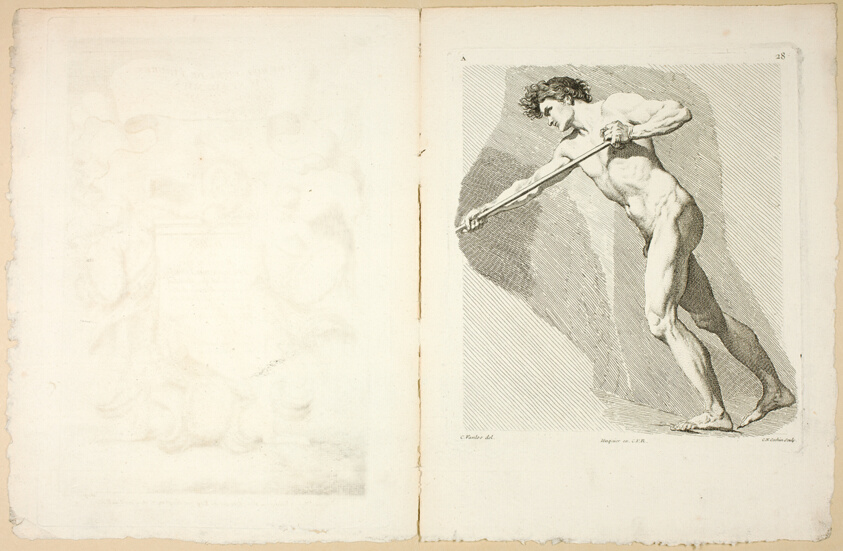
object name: Print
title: Page 1 (Title Page) and Page 28, from Premier Livre de Figures d’Académies Gravées en Partie par les Professeurs de l’Académie Royale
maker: Gabriel Huquier (French, 1695-1772); after Edme Bouchardon (French, 1698-1762); published by Charles-Antoine Jombert (French, 1712-1784)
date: 1737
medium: Etching on ivory laid paper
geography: France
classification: etching; print; prints and drawing